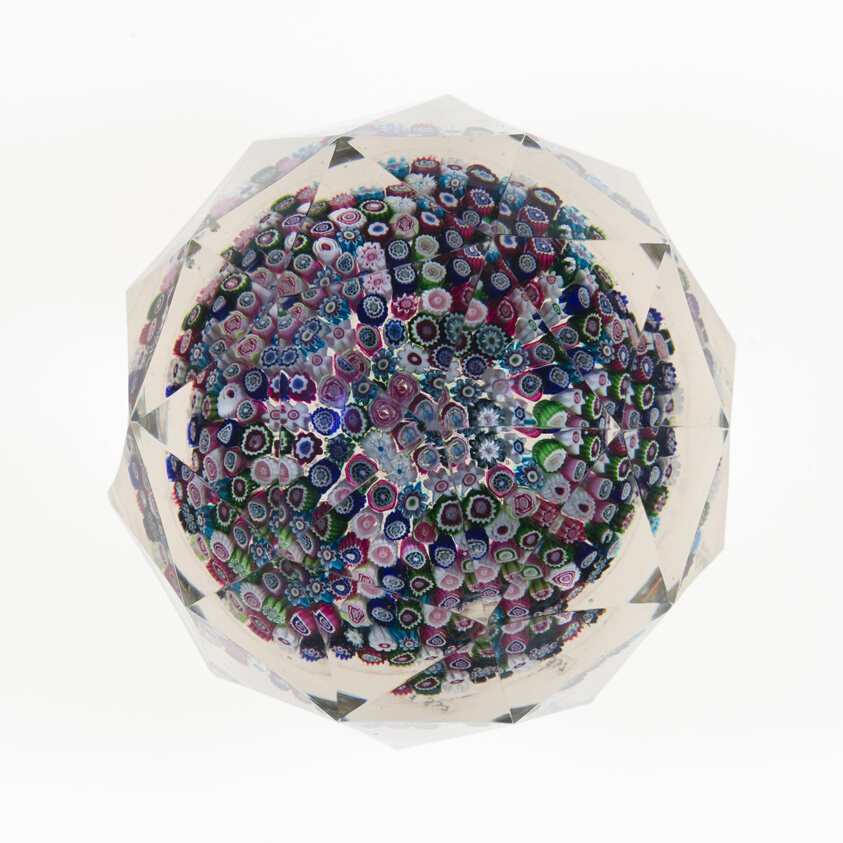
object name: Glass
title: Paperweight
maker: Clichy Glassworks (Cristalleries de Clichy); Clichy, France, 1837-1885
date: c. 1845–60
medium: Glass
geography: Clichy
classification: paperweight; glass